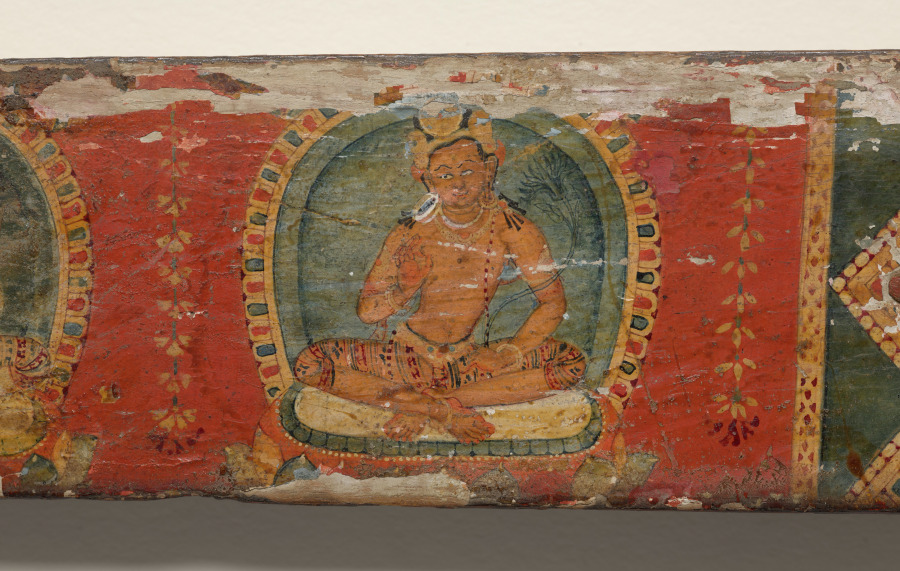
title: Four bodhisattvas and two attendants flanking Vajrasattva, bottom cover, from a Manuscript of the Perfection of Wisdom in Eight Thousand Lines (Ashtasahasrika Prajnaparamita-sutra)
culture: Eastern India, Bihar, Vikramashila Monastery. Painting: Nepal, Kathmandu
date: Sunday, September 14, 1119 (year 239 of the Newar Samvat in the month of Ashvina)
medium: Gum tempera, paper, and colors on wood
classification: Painting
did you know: The diamond pattern at the holes references the ribbons and cords that would have bound the book together.